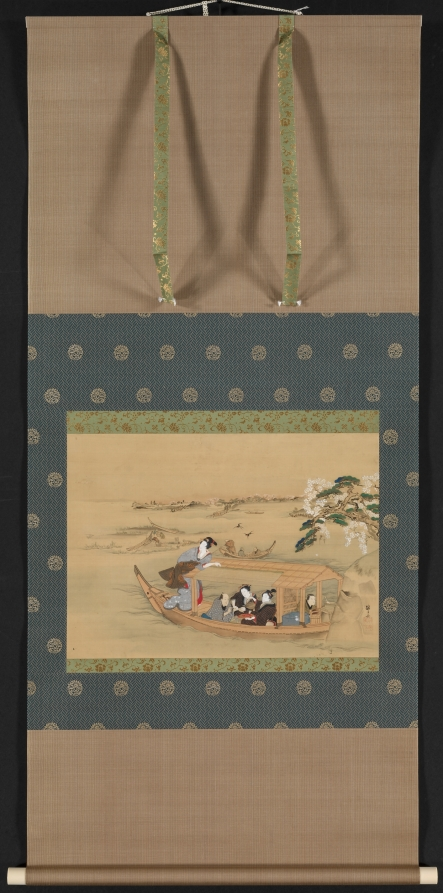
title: Pleasure Boat on the Sumida River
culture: Japan, Edo period (1615–1868)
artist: Teisai Hokuba (Japanese, 1771–1844)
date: 1800s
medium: Hanging scroll; ink and color on silk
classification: Painting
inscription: Signed: Teisai. Sealed: Teisai go [no] in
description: After a major fire in Edo (now Tokyo), the Yoshiwara licensed brothel district was relocated to an area accessed via boat along the Sumida River, giving rise to many compositions depicting travel there. Here, attendants with checkered robes serve refreshment to a client. A figure at the fore of the boat tends to the kitchen. A courtesan at the aft, or rear, surveys the river scene. Acquaintances converse in modest commuter boats, and fishers put in to a tiny island. The boat is near the entrance to the San’ya Canal, where pleasure-seekers would disembark.